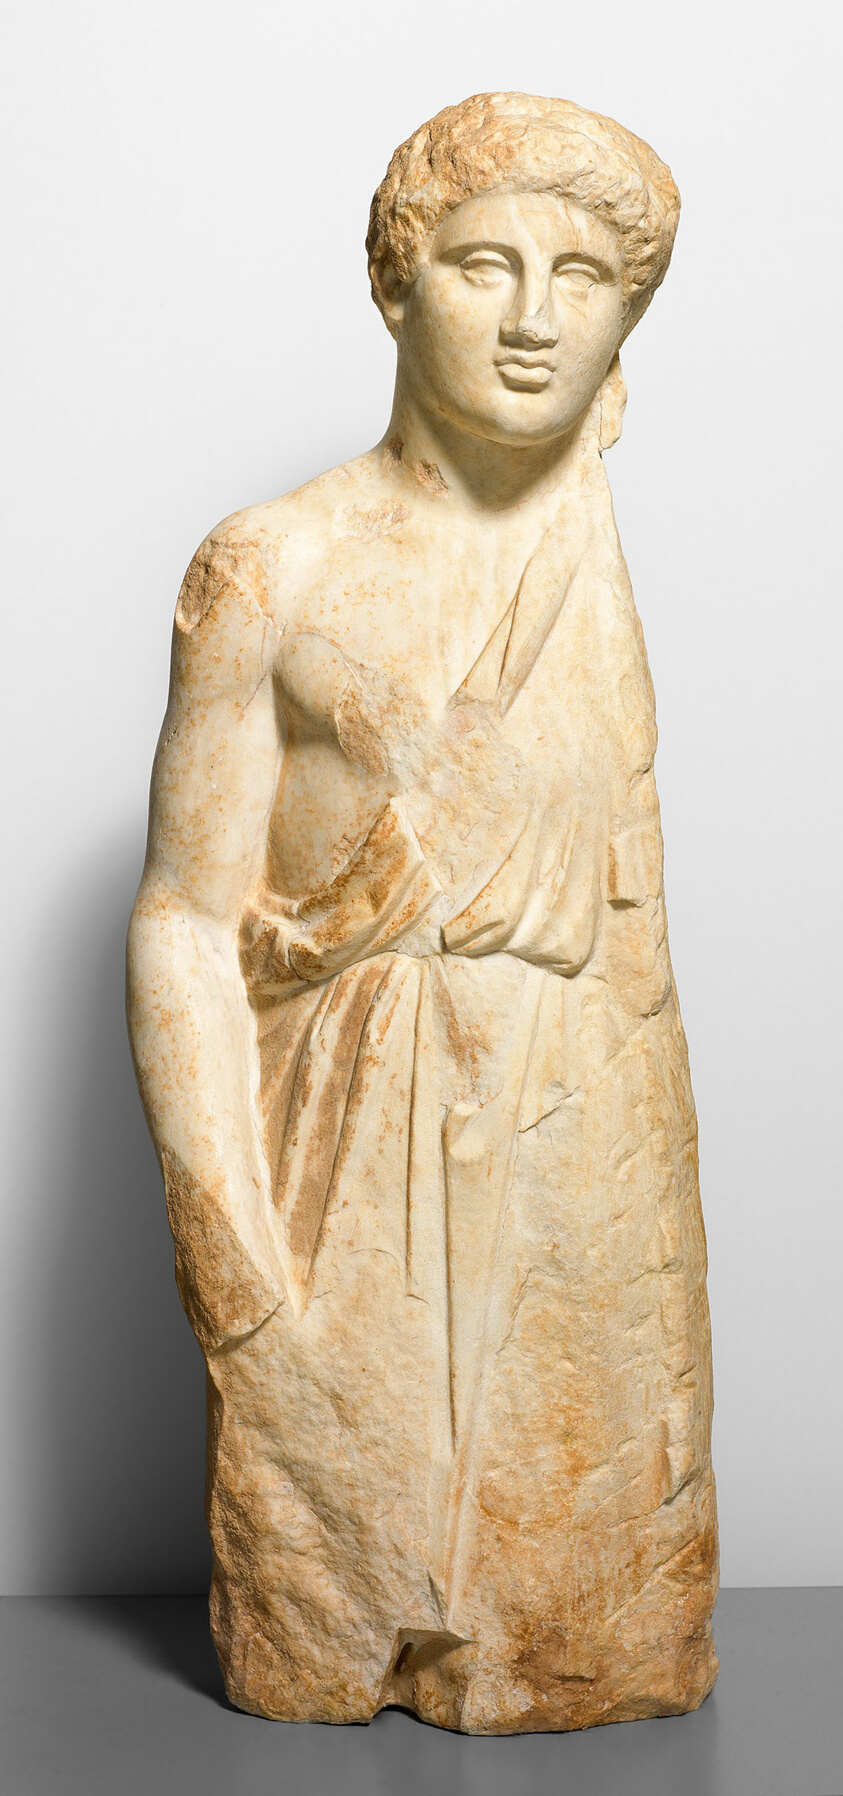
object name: Sculpture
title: Figure of a Youth from a Funerary Stele (Monument)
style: greek, ancient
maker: Greek; Athens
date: about 380 BCE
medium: Marble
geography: Greece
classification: marble; stone; sculpture; ancient art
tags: funerary art, youth